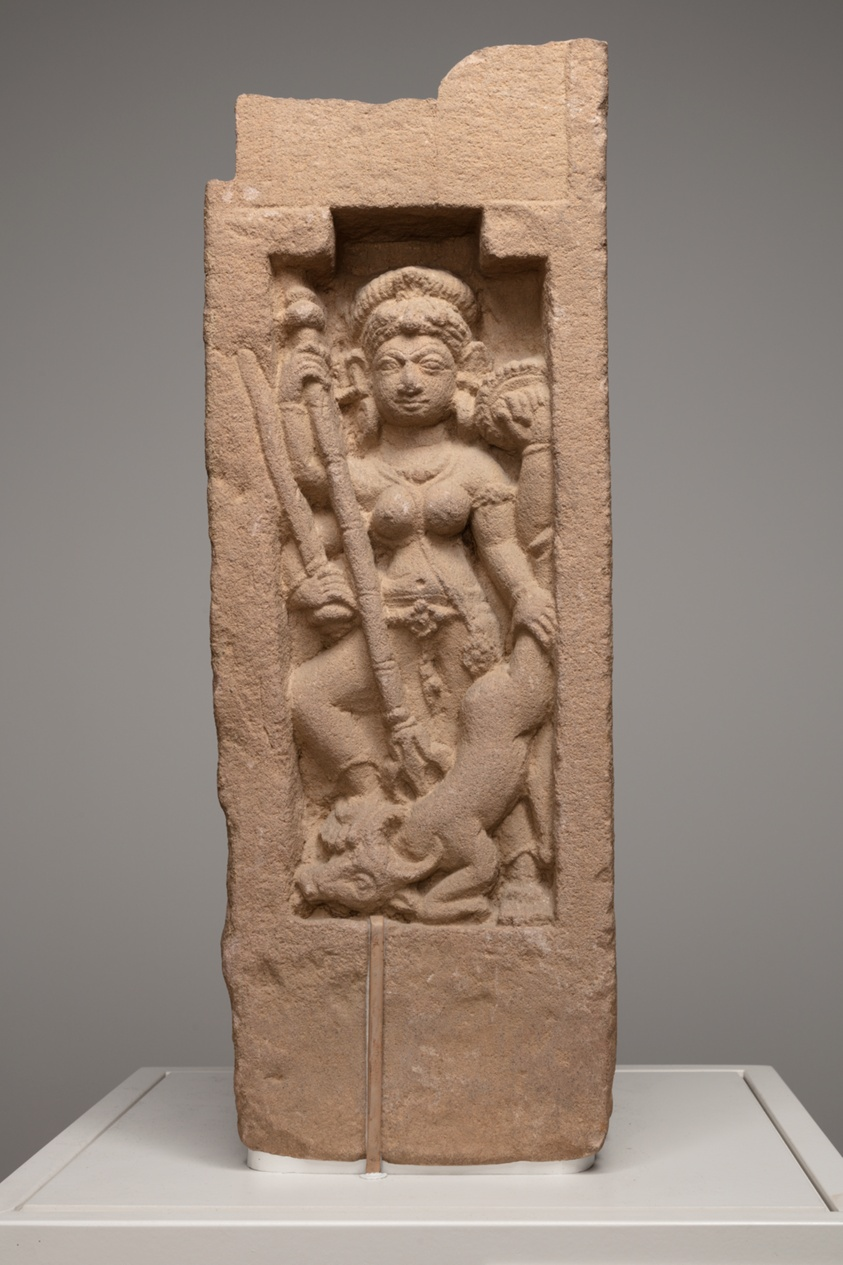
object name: Architectural fragment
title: Pillar Fragment with Gods Shiva and Ganesha and Goddesses Parvati and Durga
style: South Asian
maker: India; Madhya Pradesh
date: 8th/9th century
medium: Sandstone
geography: Madhya Pradesh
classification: stone; architectural fragment; asian art